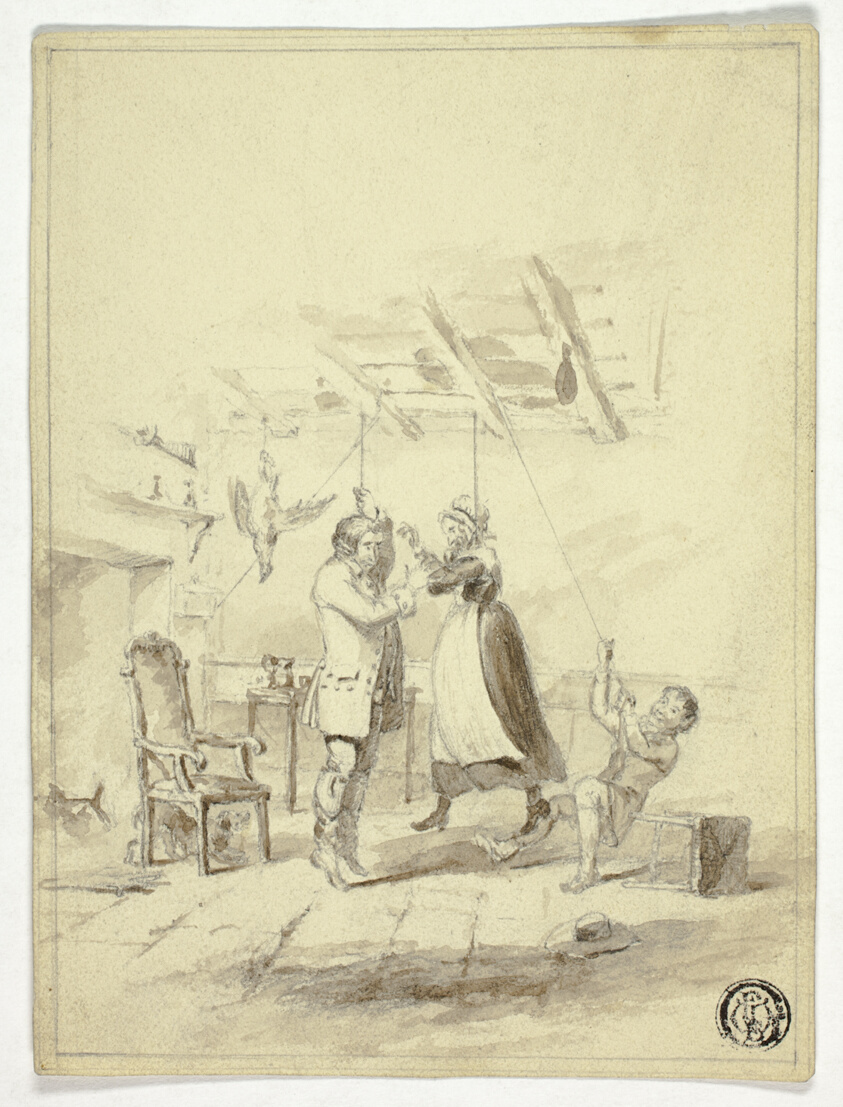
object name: Drawing and Watercolor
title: The Hanging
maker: Attributed to Abraham Cooper; English, 1787-1868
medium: Brush and brown wash, with graphite, on cream wove paper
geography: England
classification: ink or chalk wash; drawings (visual works); prints and drawing